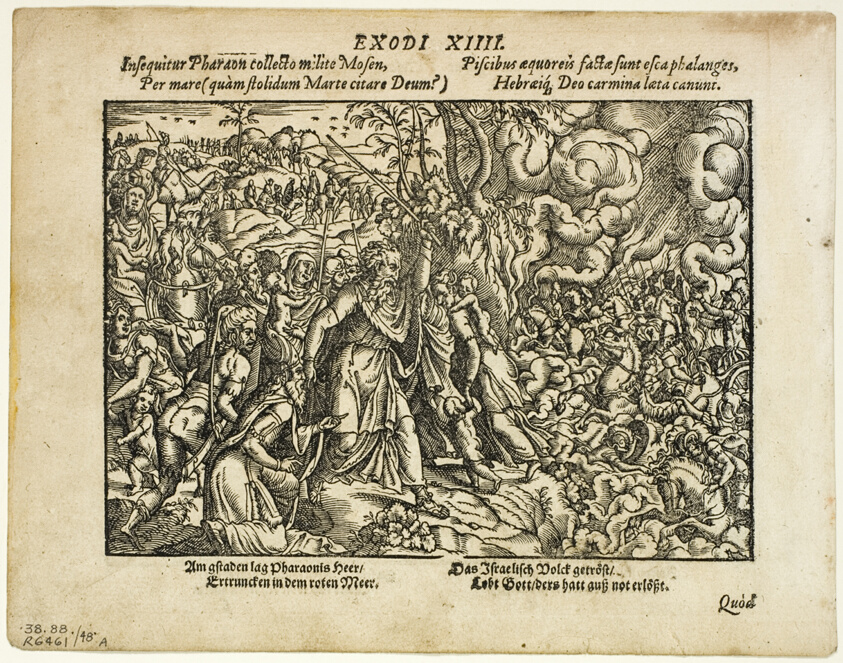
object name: Print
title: The Passage of the Red Sea (recto) and The Burial of Jacob (verso) from Neuwe Biblische Figuren, plate 48 from Woodcuts from Books of the XVI Century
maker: Jost Amman (Swiss, 1539-1591); assembled by Max Geisberg (Swiss, 1875-1943)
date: 1565, assembled into portfolio 1937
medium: Woodcut on paper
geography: Switzerland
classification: woodcut; print; prints and drawing